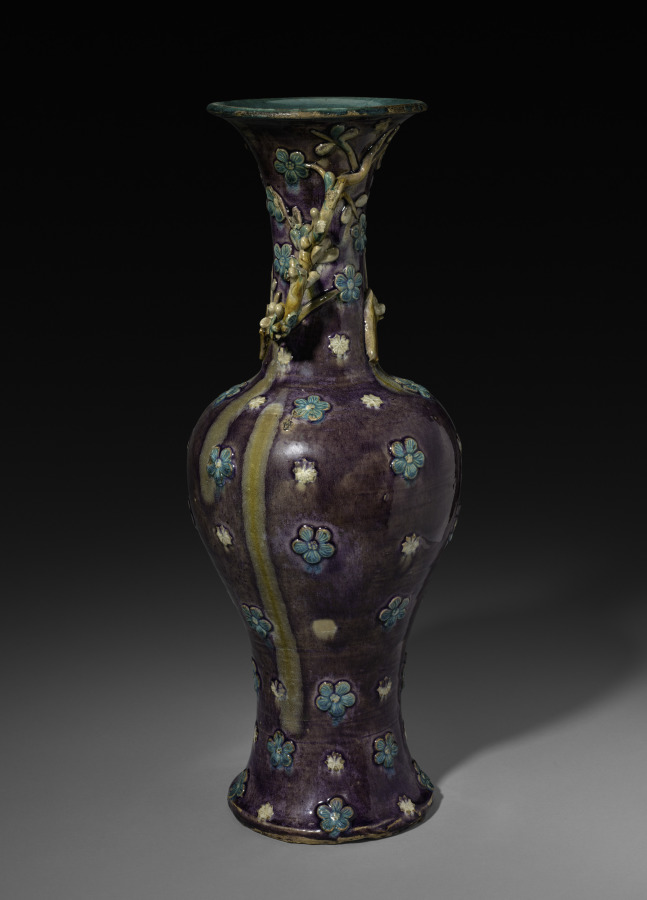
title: Vase with Branch of Plum Blossoms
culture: China, Shanxi province, Ming dynasty (1368-1644)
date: 1500s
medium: Glazed stoneware with molded and modeled decoration, Fahua ware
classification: Ceramic